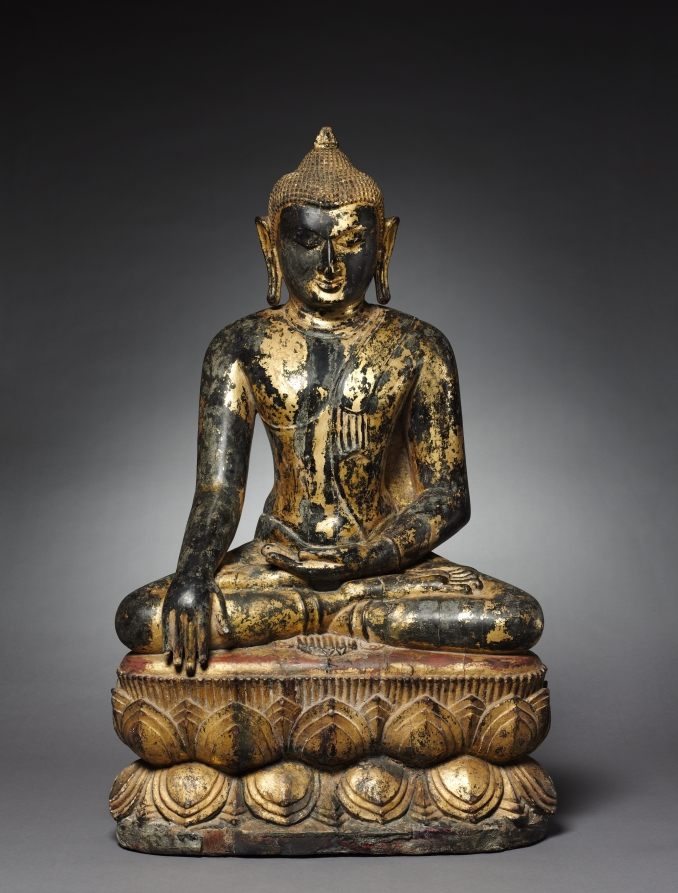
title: Seated Buddha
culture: Burma (Myanmar)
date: 1100s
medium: Gilt lacquer on solid wood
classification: Lacquer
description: This rare image of the historical Buddha Shakyamuni is shown seated with crossed legs in the position of meditation. His left hand rests on his lap, referring to his meditation under the Bodhi tree, and his right hand is in the earth-touching gesture—calling the earth to witness his enlightenment. The Buddha sits on a double lotus pedestal that indicates the presence of a transcendent being. The sculptural style is typical of sculptures made at the Buddhist site of Pagan. Sculptures such as this were installed in niches in an interior passage of a temple. As is typical of Burmese works, this sculpture was carved from a solid piece of wood. Its surface was covered in black lacquer and then gilded; a great deal of the gilding remains intact. Because lacquer is an easily perishable material, works of this type and size are exceedingly rare; this sculpture is one of the best extant examples.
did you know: The parallel lines with heart-shaped ends near the Buddha's ankles are the rippling pleats of his garment's hem.